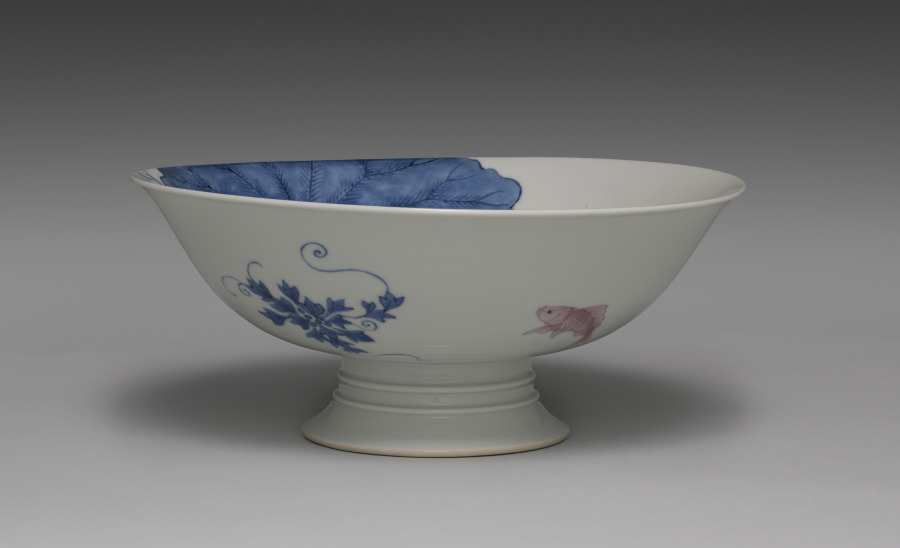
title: High-Footed Bowl with Lotus Pond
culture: Japan, Meiji period (1868–1912)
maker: Seifū Yohei III (Japanese, 1851–1914)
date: 1887–92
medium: Porcelain with underglaze color and modeled designs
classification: Ceramic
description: Seifū Yohei III was the most prominent head of a ceramics studio in Kyoto that specialized in Chinese-style porcelains and especially items for use in sencha (煎茶), or the drinking of steeped-leaf tea with companions. Sencha was popular among the bunjin of Kyoto and Osaka, who often enjoyed it as part of their emulation of Chinese culture. While sencha was by design less formal than the Japanese tea ceremony, it still featured the display of treasured objects. Prized Chinese antiquities were generally unobtainable, so substitutes such as the Gu-Shaped Flower Vase, CMA 2022.224, were much in demand. Bowls for distributing sweets, like this one, were also a staple of sencha gatherings.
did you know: This high-footed bowl simulates exploration of a pond both from underwater and from the sky.